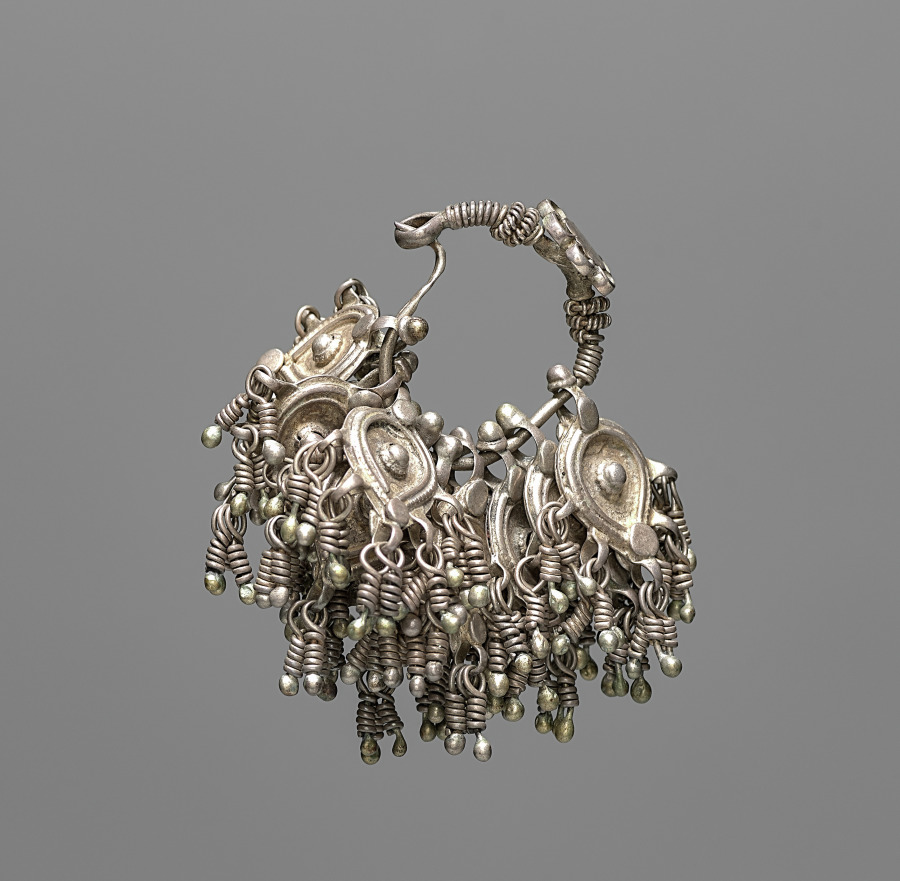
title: Earrings (?)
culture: India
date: 1800s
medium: silver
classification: Jewelry